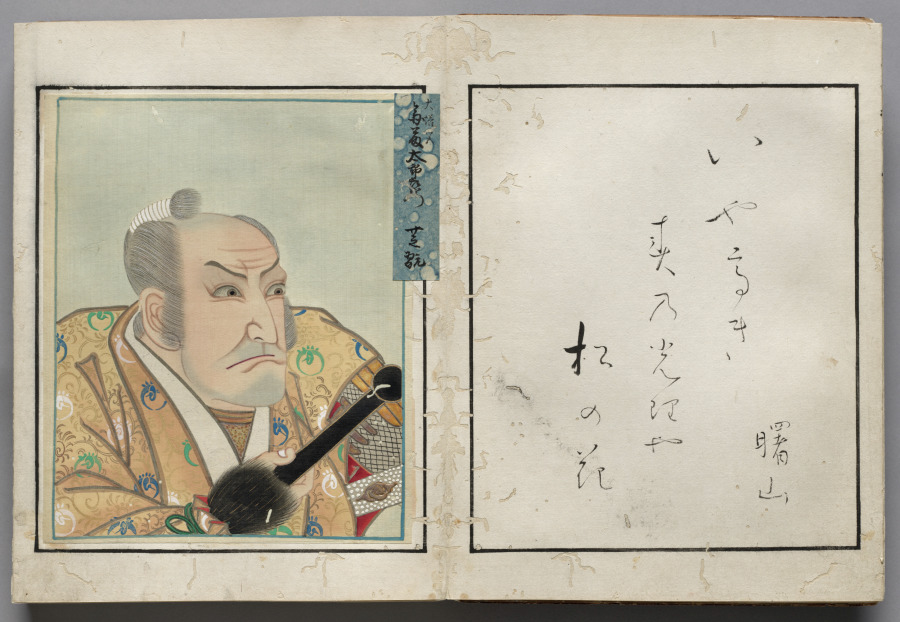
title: Double-Leaf from Album of Actor Portraits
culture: Japan, Edo period (1615–1868)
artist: Shōrakusai (Japanese)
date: c. 1790–1810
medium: double-leaf from an accordion-style album; ink on paper (right) and ink and color on silk (left)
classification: Bound Volume